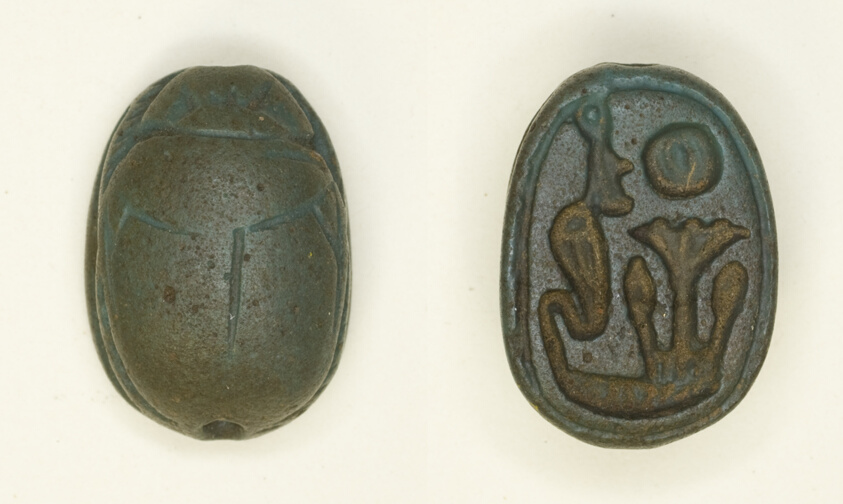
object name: Costume and Accessories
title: Scarab: Uraeus with Lotus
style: new kingdom, ancient, nineteenth dynasty, egyptian, eighteenth dynasty, twentieth dynasty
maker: Egyptian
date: New Kingdom, Dynasties 18–20 (about 1550–1068 BCE)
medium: Glass (?)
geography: Egypt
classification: scarab; ancient art; costume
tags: serpents, insects, lotus, plant-derived motif, snakes, sun, suns